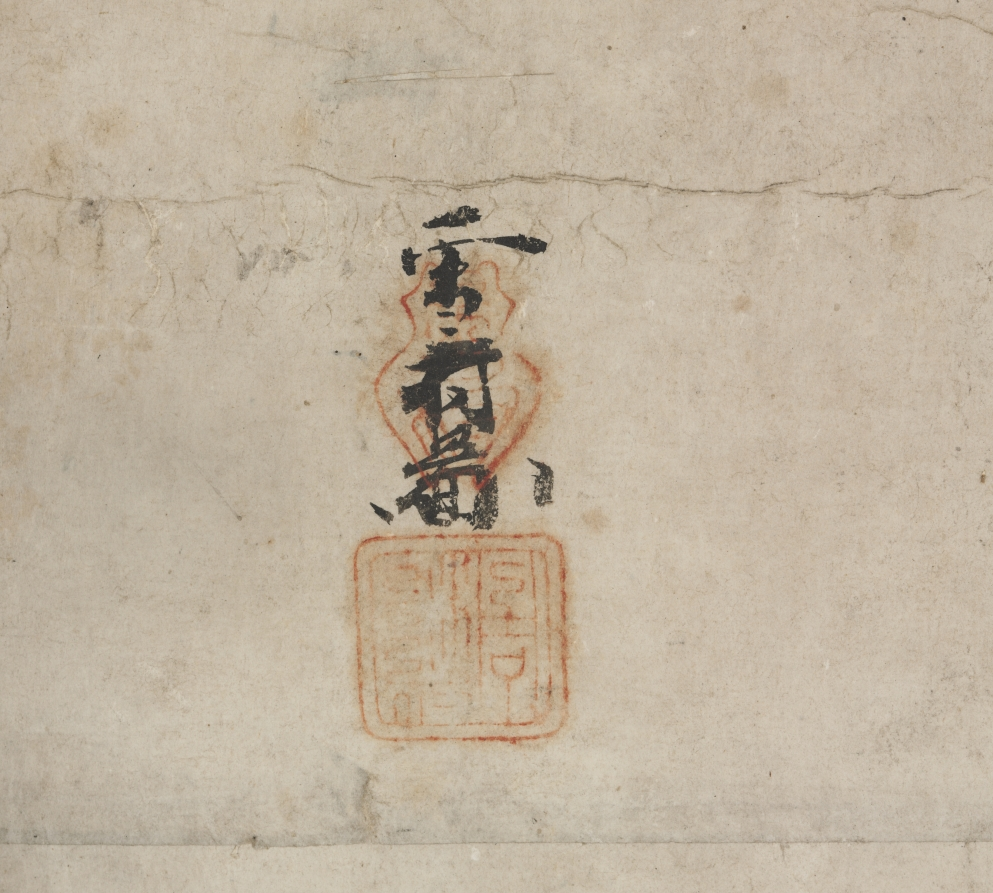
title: Dragon and Tiger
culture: Japan, Muromachi period (1392–1573) to Momoyama period (1573–1615)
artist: Sesson Shūkei (Japanese, c. 1492–c. 1577)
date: c. 1546–56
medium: One of a pair of six-panel folding screens; ink on paper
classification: Painting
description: In Chinese cosmology, dragons produce rain clouds. The dragon disappearing into and reemerging from clouds in this painting seems to generate rough waves in the water below, pulling it toward the sky. The shape of the foreground wave is indirectly sampled from a painting by 13th-century Chinese painter Yujian, a handscroll once owned by the Ashikaga military rulers of Japan. Sesson must have known the famous painting though copies, and made a copy of his own. Here, the wave reinforces the powerful quality of the dragon.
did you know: Sesson's dragon, winding in and out of clouds, may have taken inspiration from Chinese Ming-dynasty works in the style of 13th-century Chinese painter Chen Rong.